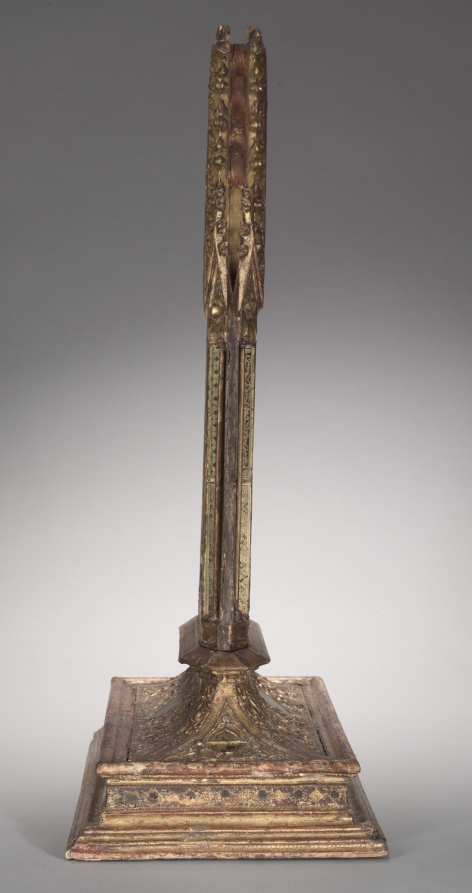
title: Frame for a Portable Reliquary Icon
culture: Italy, Siena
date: 1347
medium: gilded wood, modeled gesso, verre églomisé, glass cabochons, and relics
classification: Glass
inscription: an inscription with a stipled background runs around the lowest edge of the upright part of the frame: obverse: HOC/OPUS : FACTUM . FUIT . SUB . ANNO . DO/MINI; reverse: [small loss] /CCC . XLVII . TEMPORE . DOMINI . MINI/CINI. [This/work : has . been . made . under . year . of . the . Lord [small loss] /300 47 . in . the . time . of the Lord . Mini/Cini.] Another inscription appears on the obverse and reverse of the base: LUCAS ME FECIT. [Luke has made me.]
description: In the Middle Ages relics were thought to possess extraordinary power and were enshrined in lavish vessels called reliquaries. This complex frame once contained a painted image on each side, believed to be the Madonna and the Crucifixion, both long since lost. These images were surrounded by 17 carefully labeled relics, still visible. Intentionally portable, such votive objects could be easily carried from room to room or building to building as needed. A Latin inscription around the base reads: This work has been made under the year of the Lord CCCXLVII [1347] in the time of the Lord Mini/Cini. The inscription likely refers to Mino Cinughi, rector of the Hospital of Santa Maria della Scala in Siena, 1340-51. The Cinughi coat of arms as well as those of the hospital appear on the base. Another inscription, LUCAS ME FECIT (Luke made me), appears on both sides of the base. While this object probably resided on an altar in the hospital, the fact that it has two sides suggests it was carried aloft in processions.